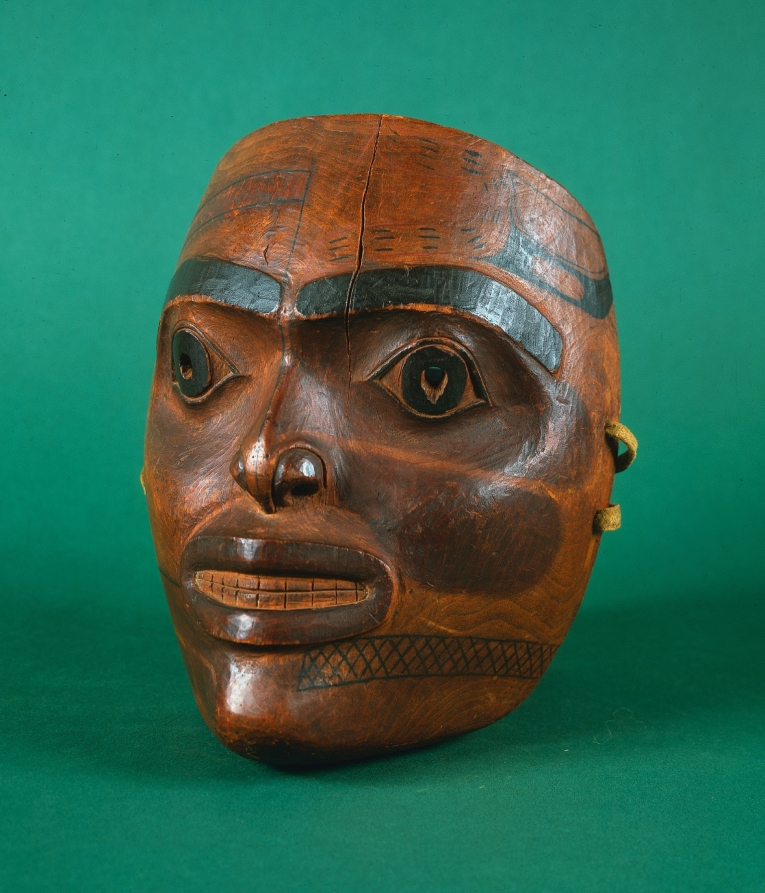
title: Mask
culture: Native North America, Northwest Coast, Alaska, Tlingit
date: late 1800s–early 1900s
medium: wood (alder), pigment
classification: Sculpture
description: In 1998, Robert Joseph, a Northwest Coast chief, recalled that when he donned ceremonial dance masks as a youth, "all the world is somewhere else . . . I am the mask . . . the bird . . . the animal . . . the spirit. I transcend into the being of the mask." Although this mask's identity is lost, it may represent a mythic ancestor of a Tlingit family and perhaps was worn during a winter ceremony.